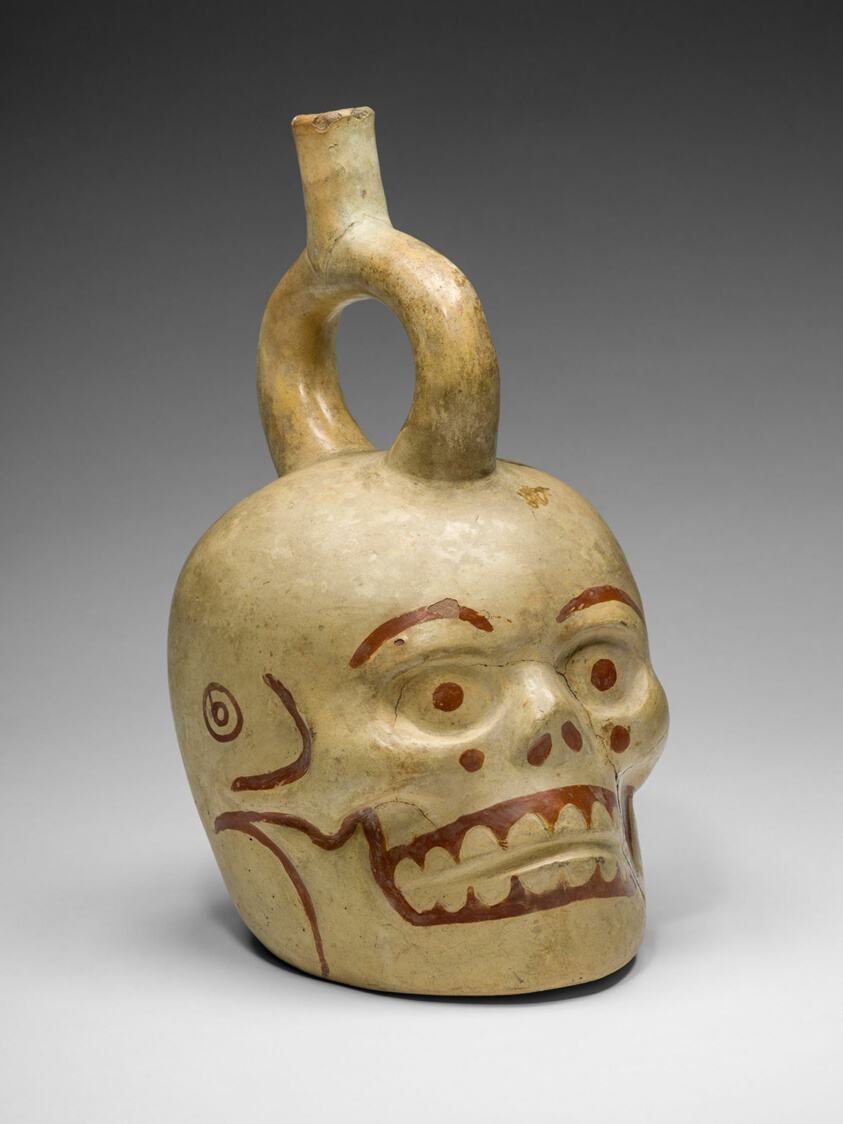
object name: Vessel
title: Vessel in the Form of a Skull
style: moche, mochica, early intermediate period, Pre-Columbian, americas, andes, Arts of the Americas, andean, south american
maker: Moche (North coast, Peru)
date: 100 BCE–500 CE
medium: Ceramic and pigment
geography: Peruvian North Coast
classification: earthenware; ceramics; vessel; art of the americas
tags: skulls, death